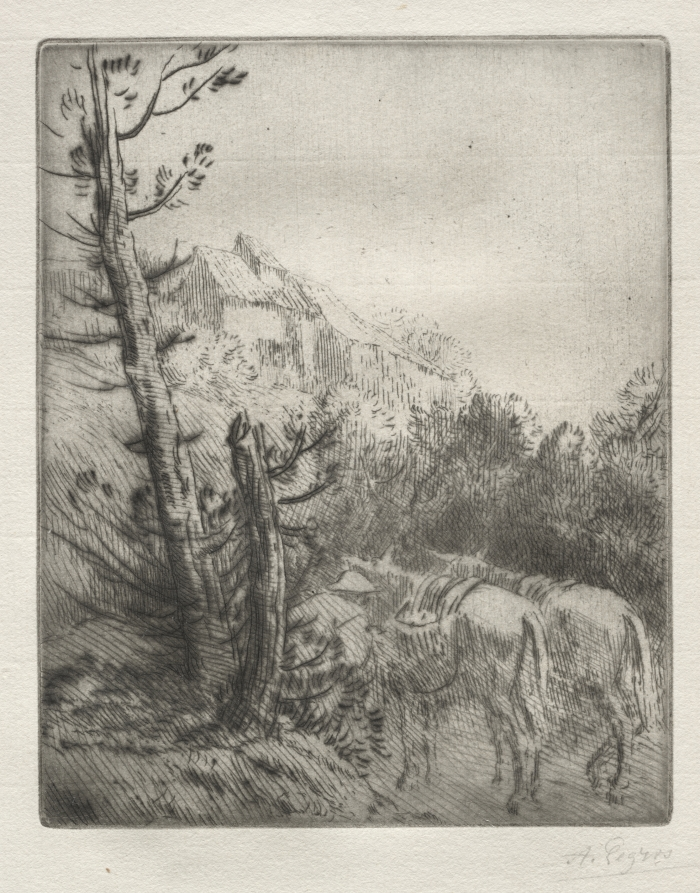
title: The Farm on the Hill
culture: France, 19th-20th century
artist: Alphonse Legros (French, 1837–1911)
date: c. 1857–1911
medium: etching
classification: Print